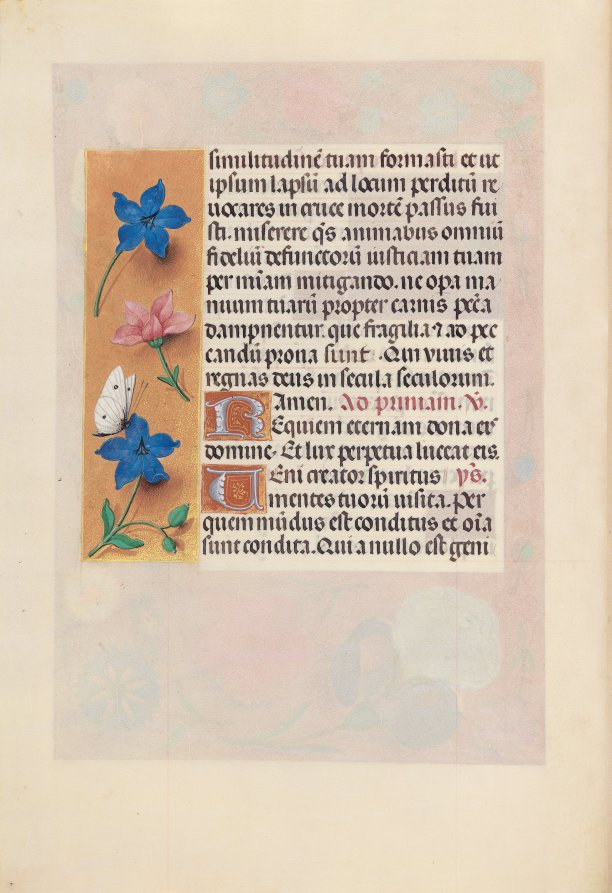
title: Hours of Queen Isabella the Catholic, Queen of Spain: Fol. 25v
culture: Flanders, Ghent and Bruges, late 15th century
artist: Master of the First Prayerbook of Maximillian (Flemish, c. 1444–1519)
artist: and Associates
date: c. 1500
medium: ink, tempera, and gold on vellum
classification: Bound Volume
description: A great lover of Flemish art, Queen Isabella treasured her many devotional books. This deluxe manuscript was created for her private devotions by highly organized and distinctly talented manuscript painters active in Ghent and Bruges. The Ghent-Bruges school represents the culmination of Flemish book painting, whose main features were the use of rich colors, illusionistic effects, a love of landscape, and a strong sense of visual narrative. Manuscripts produced by this circle of artists are renowned for their border decoration featuring a rich variety of realistically painted flowers, scrolling acanthus leaves, birds, and butterflies.